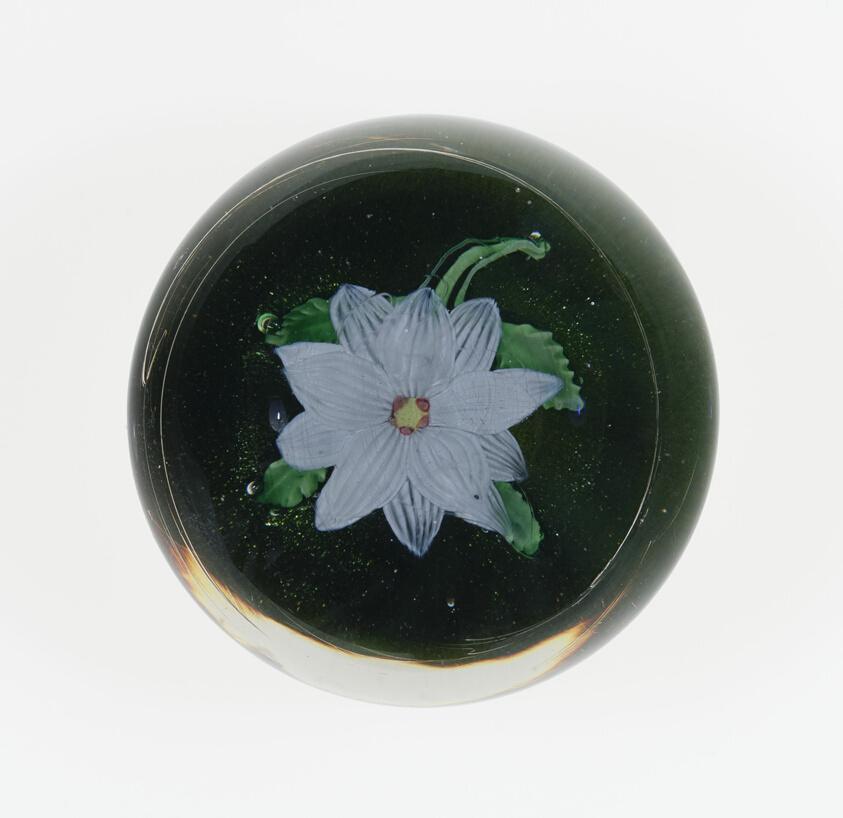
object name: Glass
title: Paperweight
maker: Saint-Louis Glassworks (Cristalleries de Saint-Louis); Lorraine, France, founded 1586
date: c. 1845–60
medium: Glass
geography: Saint-Louis-lès-Bitche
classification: paperweight; glass